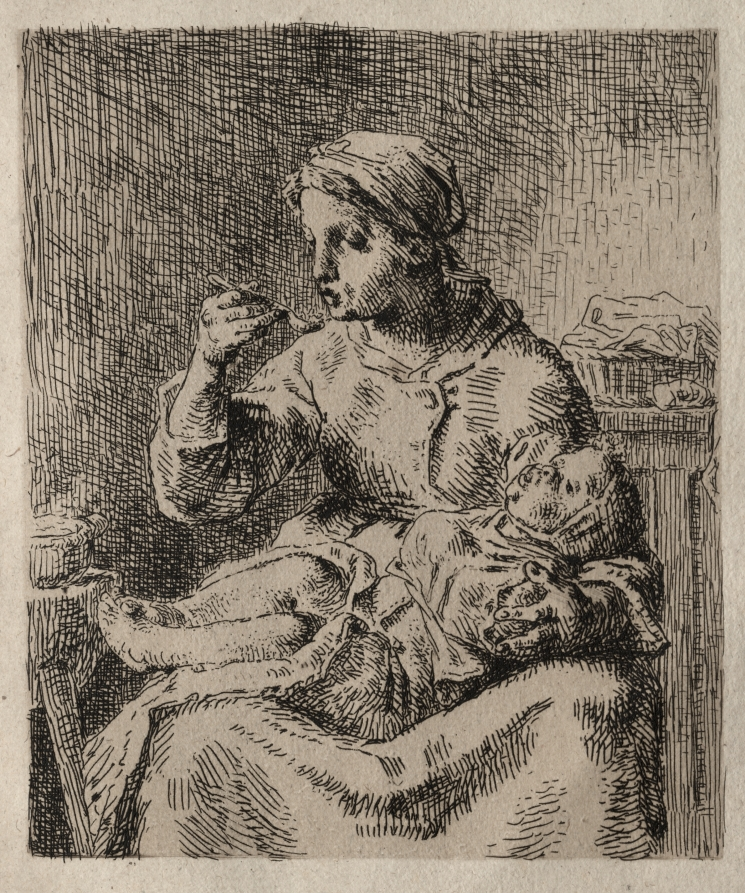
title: La Bouillée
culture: France, 19th century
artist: Jean-François Millet (French, 1814–1875)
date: 1861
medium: etching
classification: Print